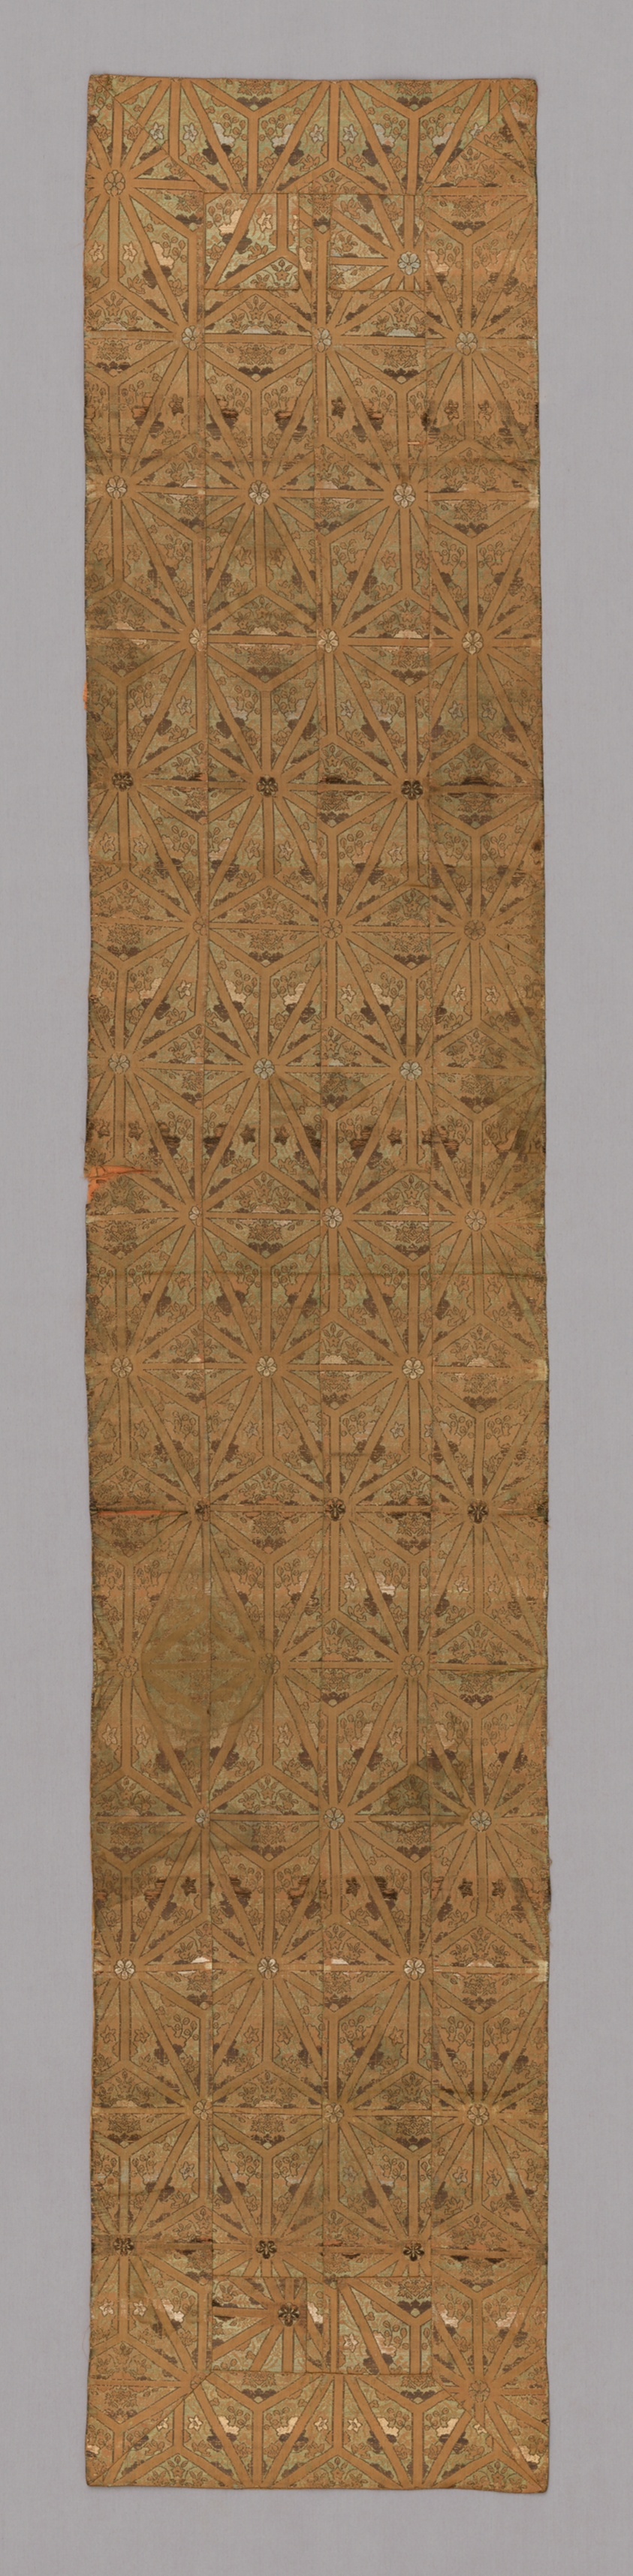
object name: Textile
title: Ôhi (Stole)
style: Japanism, late edo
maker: Japan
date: late Edo period (1789–1868), 1800/68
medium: Silk, gold-leaf-over-lacquered-paper-strip, warp-float faced 4:1 satin weave with weft-float faced 1:2 ‘Z’ twill interlacings of secondary binding warps and supplementary patterning wefts; lining: silk, plain weave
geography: Japan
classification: textile; weaving; liturgical - buddhist